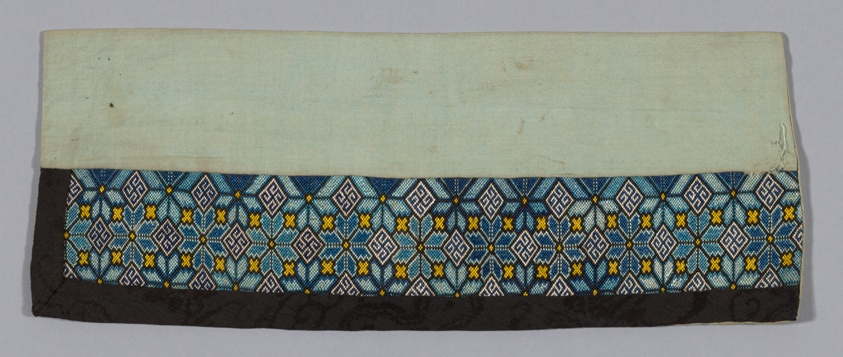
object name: Costume and Accessories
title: Band (from Woman's Trousers)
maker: China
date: 1875/1900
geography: China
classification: textile; needlework - costume; needlework (visual works); costume